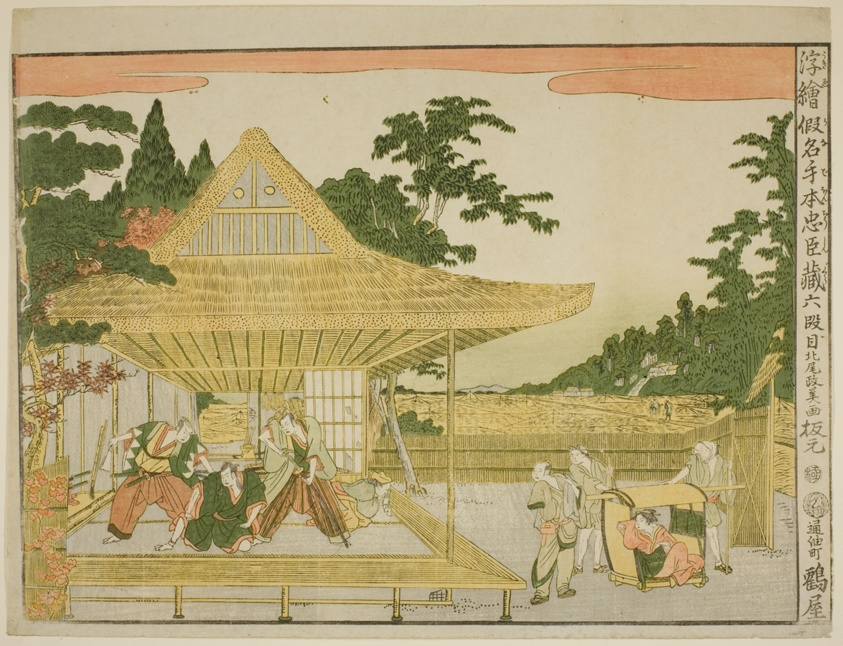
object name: Print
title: Act VI (Rokudanme), from the series "Perspective Pictures of the Storehouse of Loyal Retainers (Uki-e kanadehon Chushingura)"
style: Japanese (culture or style)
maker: Kitao Masayoshi (Kuwagata Keisai) (Japanese, 1764–1824)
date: c. 1791/94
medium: Color woodblock print; horizontal o-oban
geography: Japan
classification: woodblock print; print